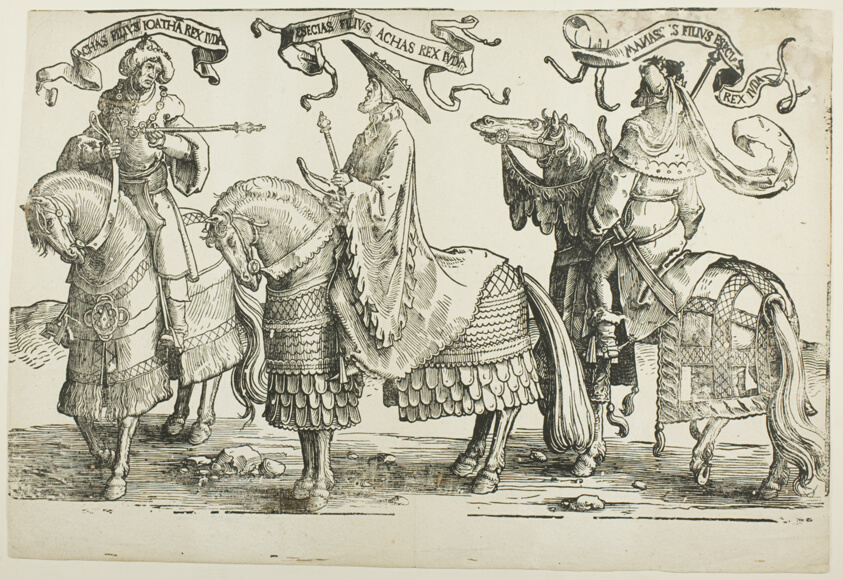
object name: Print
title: Ahaz, Hezekiah, Manasses, plate four, from The Twelve Kings of Israel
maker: Lucas van Leyden (Netherlandish, c. 1494-1533)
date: c. 1520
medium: Woodcut in black with touches of pen and brown ink on buff laid paper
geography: Netherlands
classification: woodcut; print; prints and drawing